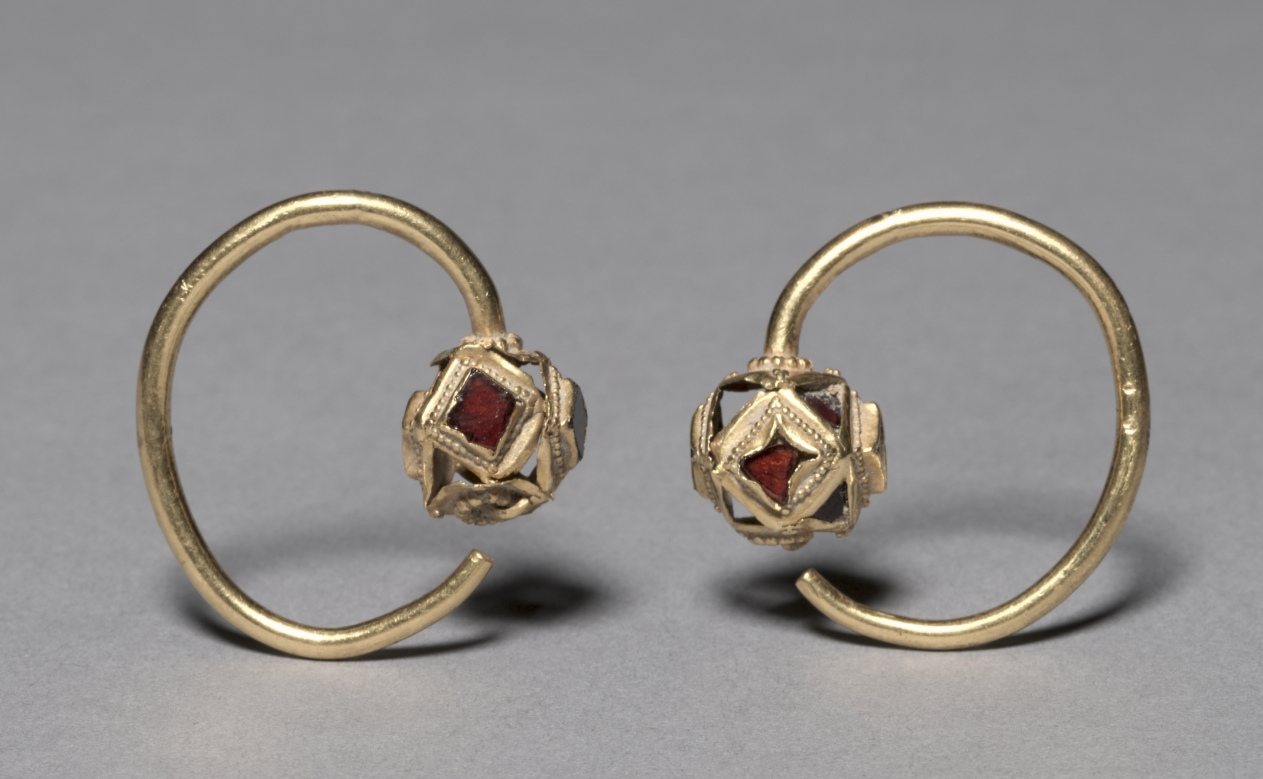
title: Earring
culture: Ostrogothic, Migration period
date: 400s CE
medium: gold with garnets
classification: Jewelry